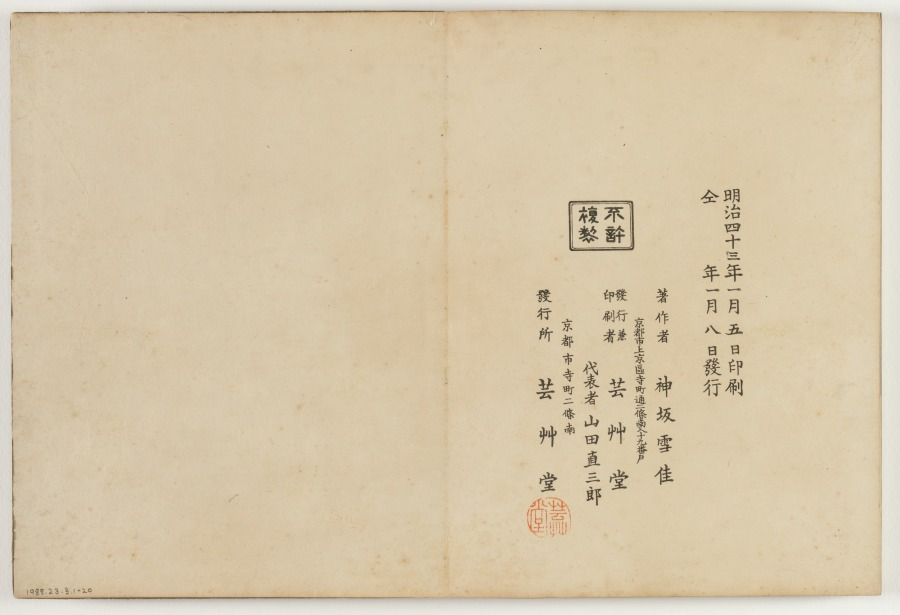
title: Flowers of a Hundred Worlds (Momoyogusa), Vol. 3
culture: Japan, Meiji period (1868–1912)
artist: Kamisaka Sekka (Japanese, 1866–1942)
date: 1909–10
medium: one of a set of three woodblock printed folding-books; ink, color, gold, and silver on paper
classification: Bound Volume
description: This volume from a set of three woodblock printed albums displays the graphic design prowess of Kamisaka Sekka. The images were first distributed one by one to subscribers to the series but later were reissued in bound form, like this book, for mass consumers. Each print features a vignette taken from nature or Japanese literature. Many of the scenes have a long history in Japan, originating in the 900s or 1000s and having been interpreted by all manner of artists since that time. Sekka’s selections hew closely to precedents from the Rinpa style originated by painter Tawaraya Sōtatsu (c. 1570–c. 1640) and calligrapher Hon’ami Kōetsu (1558–1637).